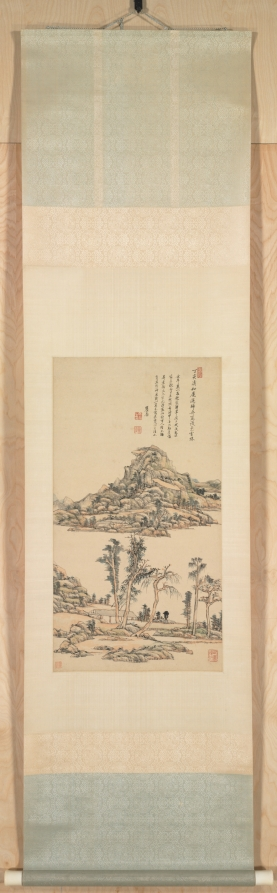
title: Landscape after Ni Zan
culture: China, Qing dynasty (1644–1911)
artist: Wang Yuanqi (Chinese, 1642–1715)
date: 1707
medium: Hanging scroll; ink and light color on paper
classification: Painting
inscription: [印]穀詒堂。 丁亥清和扈從歸舟寫設色雲林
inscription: 余年來一友匏系，簪筆鹿鹿。夙夜在公。家無甑石，日在愁城苦海中。無以解憂。惟弄柔翰出入宋元諸家，如對古人。雖不能肖其形神，庶幾一遇，亦寓意寬心之法也。麓臺。[印]原祁之印; 麓臺 [印, 右下]西廬後人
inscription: 1 additional seal of Pang Yuanji 龐元濟 (1864–1949) at the lower left corner.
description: Wang Yuanqi, an official in Emperor Kangxi’s (reigned 1662–1722) court, grew up in an artistic family. Like other mainstream painters of the Orthodox School, he followed a canon of earlier styles and artists endorsed by Ming calligrapher Dong Qichang (1555–1636). Here, Wang drew inspiration from Ni Zan (1301–1374), a Yuan dynasty painter known for his simple compositions and spare use of ink. Master Ni seldom used color, but Wang added green and ochre washes to the trees, cottages, and hills in this landscape. Painting was a way for Wang to relieve the pressures of his official duties.